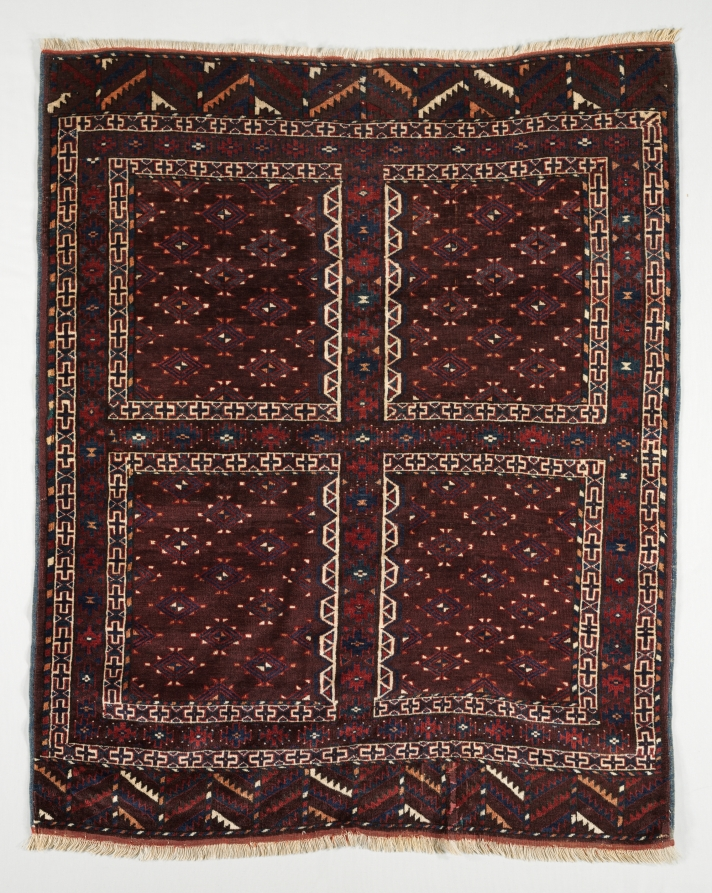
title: Door Rug (Ensi)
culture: Turkmenistan, Yomud, 19th century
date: c. 1900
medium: knotted pile, asymmetrical knot, 117 knots psi; wool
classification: Carpet